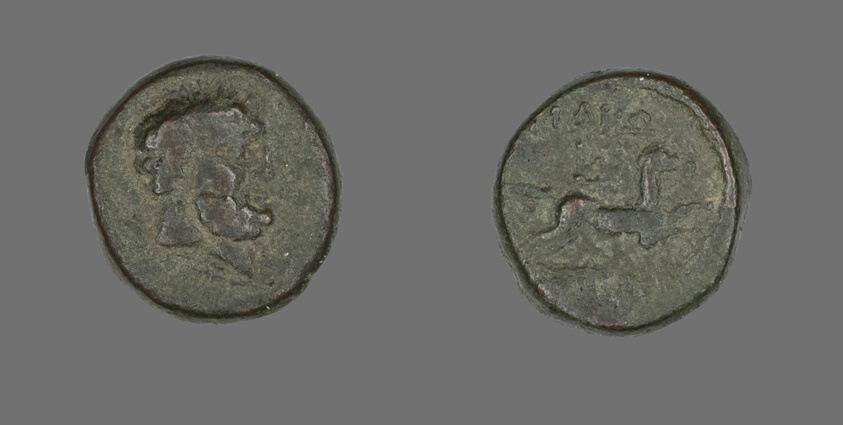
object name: Coin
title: Coin Depicting the Hero Herakles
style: greek, ancient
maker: Greek, minted in Maroneia, Thrace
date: late 2nd BCE-1st century CE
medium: Bronze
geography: Ancient Greece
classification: coin; ancient art